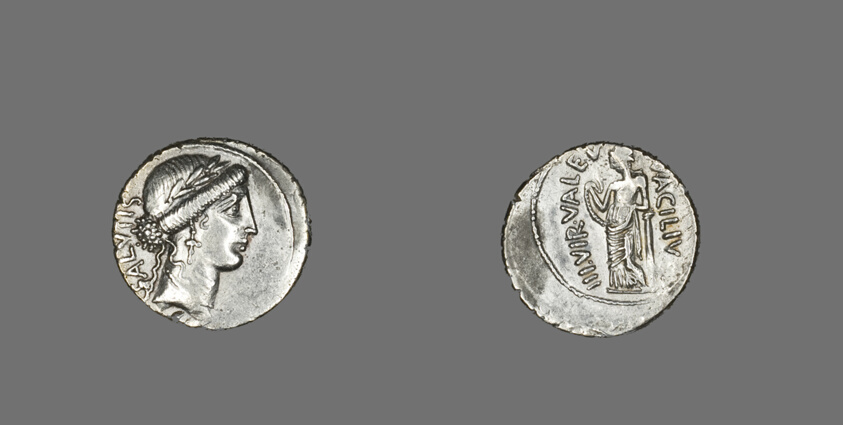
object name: Coin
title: Denarius (Coin) Depicting the Goddess Salus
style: republic period, ancient, roman (ancient, style or period)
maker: Roman, minted in Rome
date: 49 BCE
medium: Silver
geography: Acilia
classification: coin; ancient art; struck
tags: goddesses, mythological figures